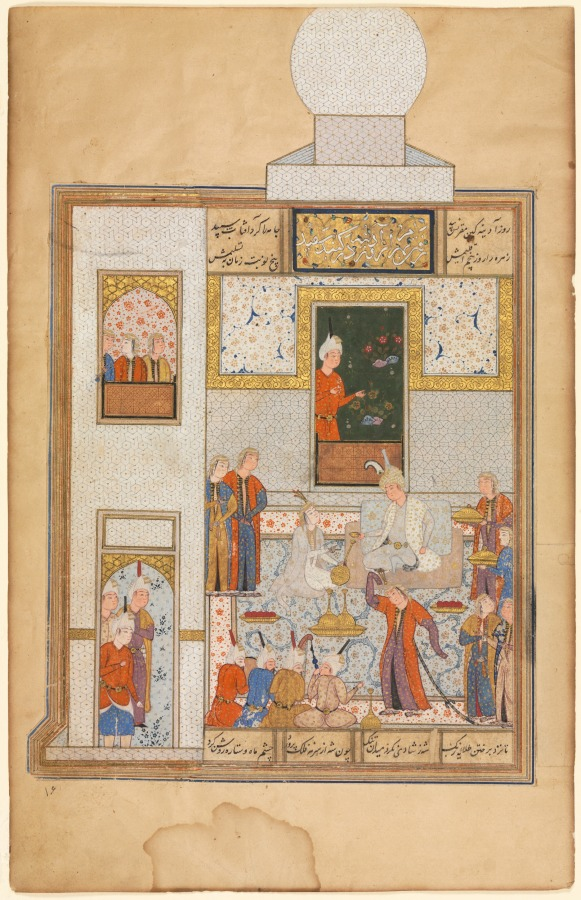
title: Bahram Visits the White Domed Pavilion on Friday, illustrated with text in Khamsa of Nizami (verso), from a Haft Paykar (Seven Portraits) of Nizami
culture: Iran, Shiraz, Safavid period (1501-1722)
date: c. 1560–80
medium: opaque watercolor, ink, and gold on paper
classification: Manuscript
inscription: Script: Nasta'liq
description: The Haft Paykar is an epic romantic poem that tells the story of the Sasanian king, Bahram Gur (ruled AD 420–38). The story relates how the king had an architect construct seven domed pavilions with different colors for each of his seven beautiful brides who came from different parts of the world. On each day of the week, the king visited one princess and enjoyed her company. In the center of this scene, sits Bahram and his bride from Iran dressed in resplendent white garments. Attendants bring them food and drink, while a dancer and an ensemble of musicians entertains them.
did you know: The wife recounts a tale with dancing fairies, suggested by the girl dancing to music in the foreground of the painting.